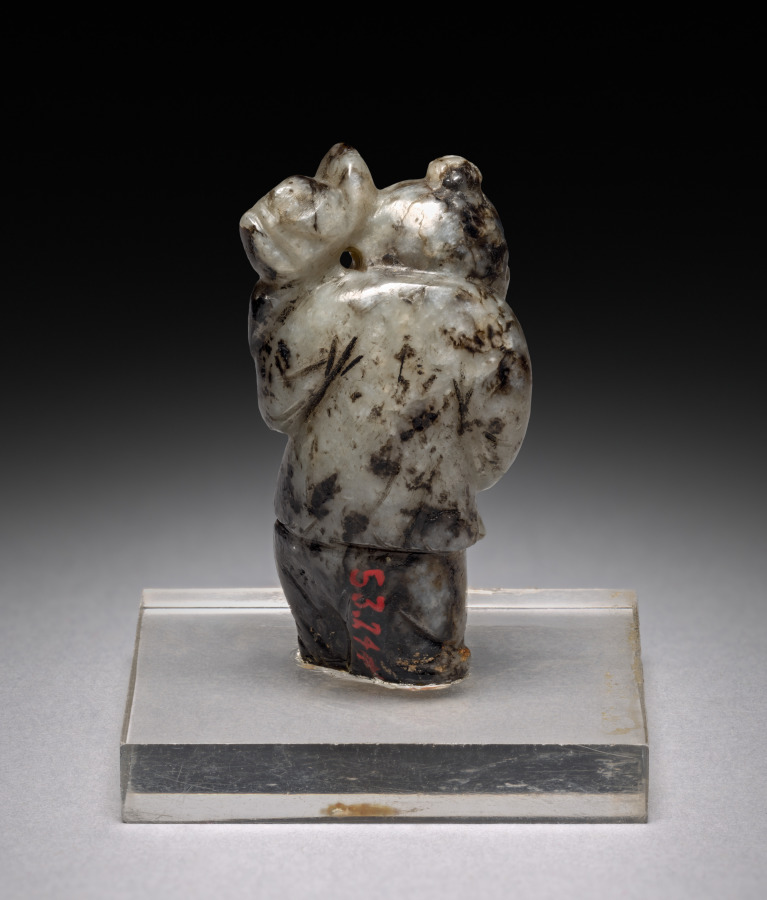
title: Boy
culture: China, Tang dynasty (618-907) - Song dynasty (960-1279)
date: 8th-10th Century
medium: jade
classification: Jade